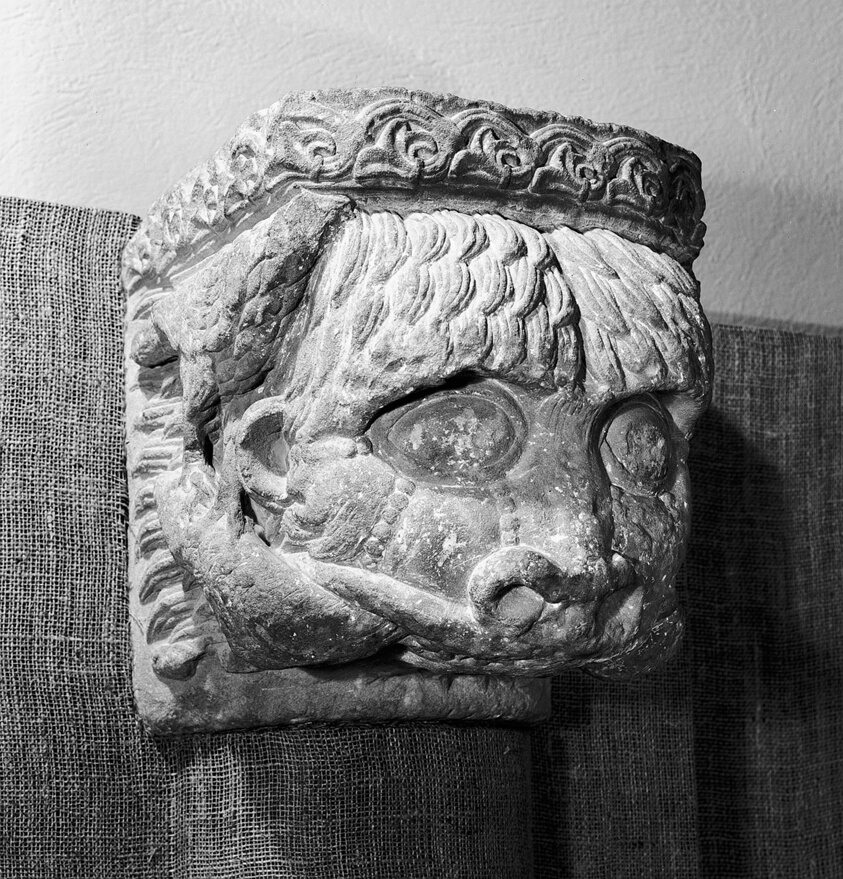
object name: Sculpture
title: Lintel Support with Lion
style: medieval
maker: Spanish; Aragon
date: 1125/50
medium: Limestone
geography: Spain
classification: architectural sculpture; sculpture; spanish; sculpture/stone; stone; limestone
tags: architectural fragment, animals, architechture, architectural detail, architectural fragments, architecture, architecture, birds, Fragment, lions